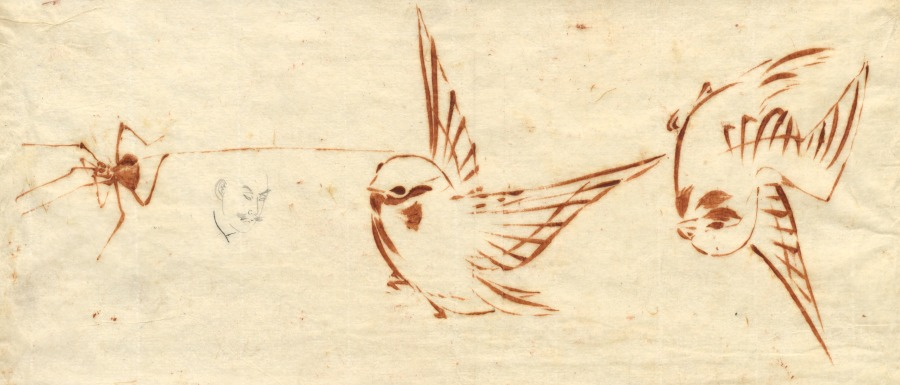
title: Sketch Page with Birds and Spider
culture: Japan, Edo period (1615–1868)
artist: attributed to Katsushika Hokusai (Japanese, 1760–1849)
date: c. 1780s-1849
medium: red ink on paper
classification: Drawing